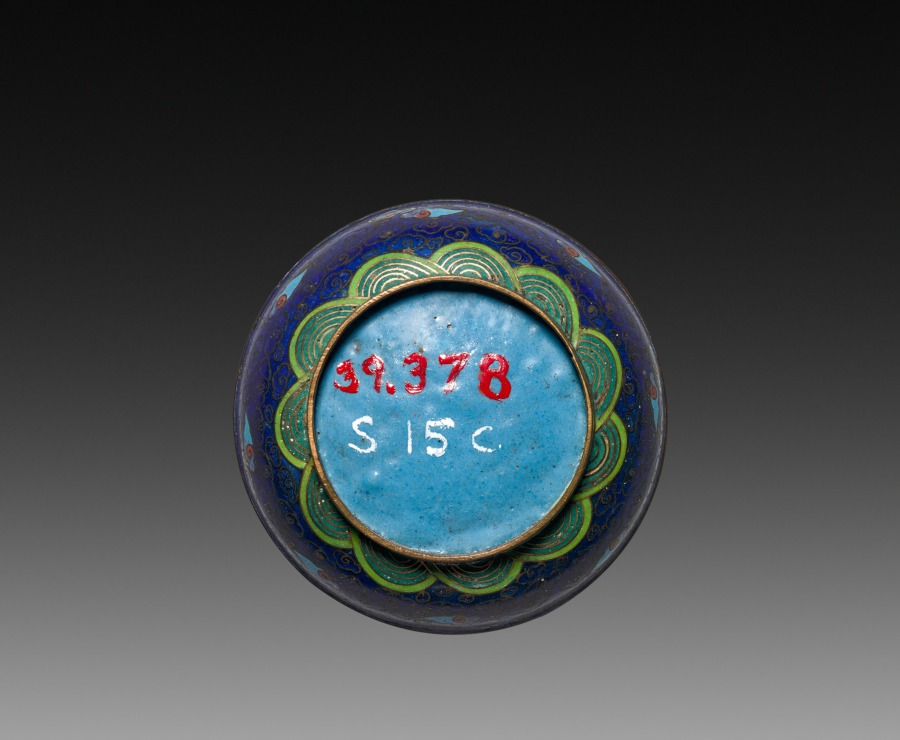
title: Box with Dragon (base)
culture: Japan, Meiji period (1868–1912) or Taishō period (1912–26)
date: c 1900– 1925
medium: cloisonne enamel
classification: Enamel